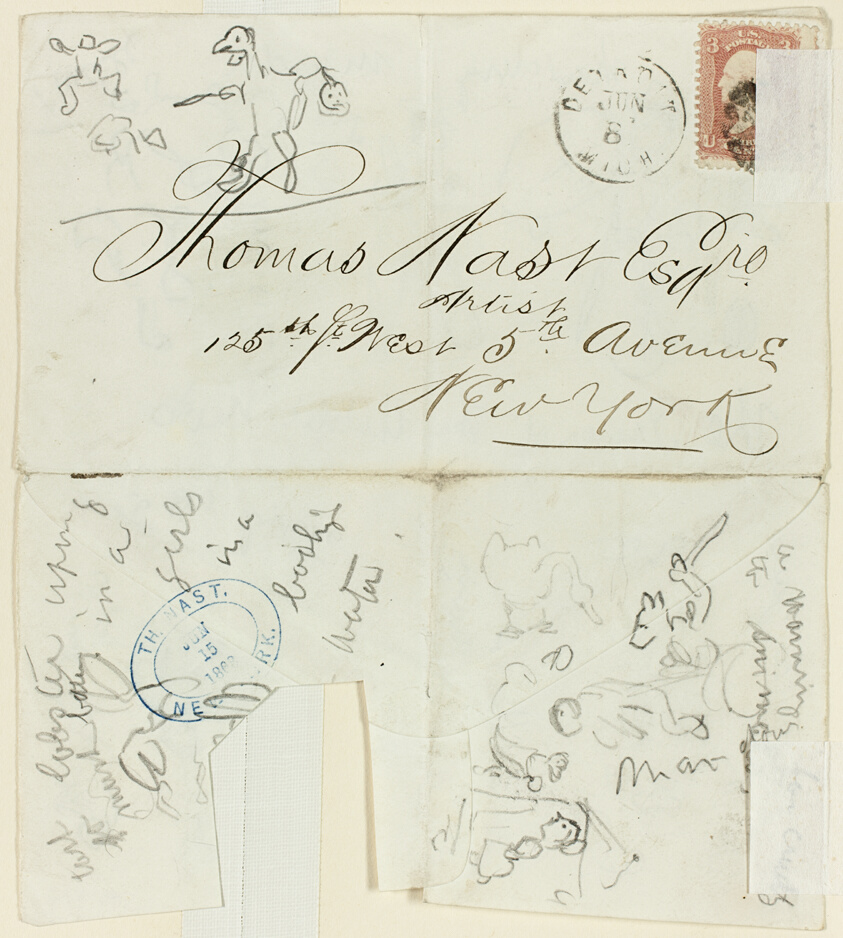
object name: Drawing and Watercolor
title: Sheet of Sketches: The Power of the Catholic Priests (recto); Sheet of Sketches (verso)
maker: Thomas Nast (American, 1840-1902)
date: 1868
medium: Graphite (recto and verso) on ivory laid paper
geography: United States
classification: graphite; paper; drawings (visual works); prints and drawing